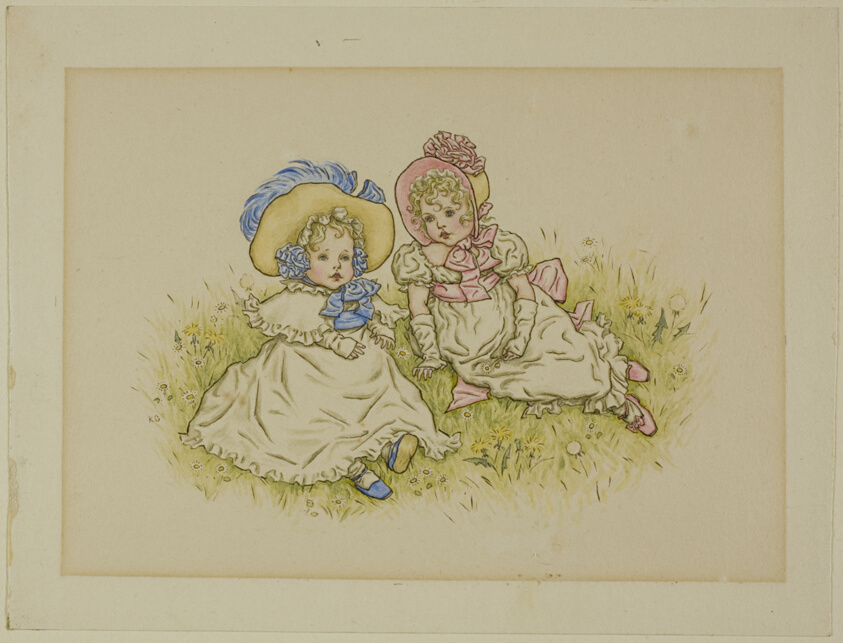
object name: Drawing and Watercolor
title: Two Little Girls with Bonnets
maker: Kate Greenaway (English, 1846-1901)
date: 1883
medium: Pen and brown ink and watercolor, over traces of graphite, on cream wove paper (discolored to tan), perimeter mounted to cream wood-pulp laminate board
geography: England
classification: watercolor; drawings (visual works); prints and drawing